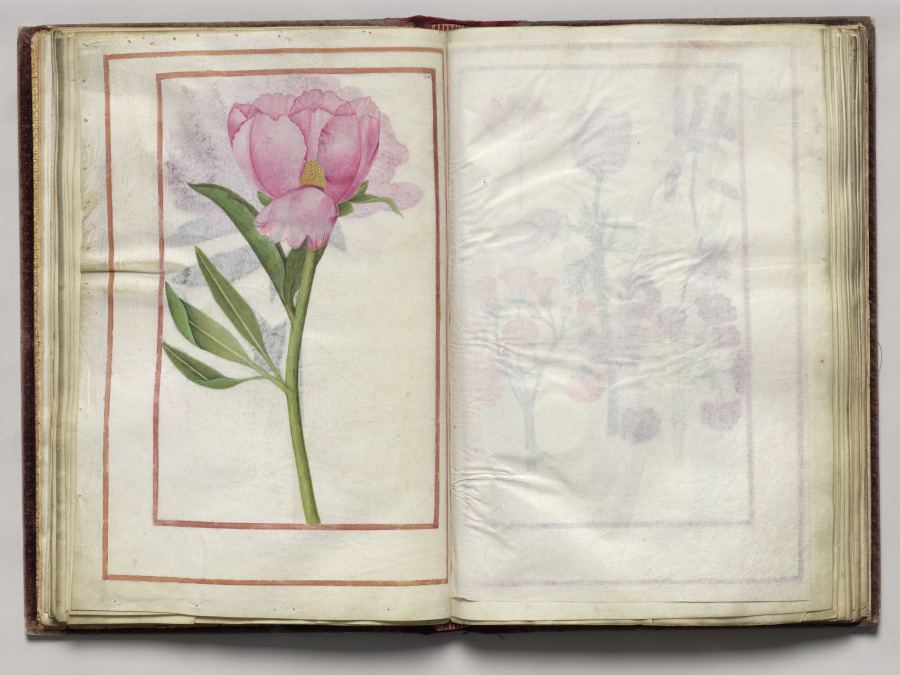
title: Pink Peony, folio 17 (verso), from Florilegium (A Book of Flower Studies)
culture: France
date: 1608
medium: watercolor, ink, silver, and gold over occasional traces of pencil, on vellum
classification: Bound Volume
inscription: Dated: Poitiers 1608 (on frontispiece) Signed: On frontispiece in black ink, lower right: Van Kuyk Notation on drawing: Frontispiece: in pencil, lower margin: * élève de Van Kessel, peintre flammand (* in pencil also appears in front of Van Kuyk's name).